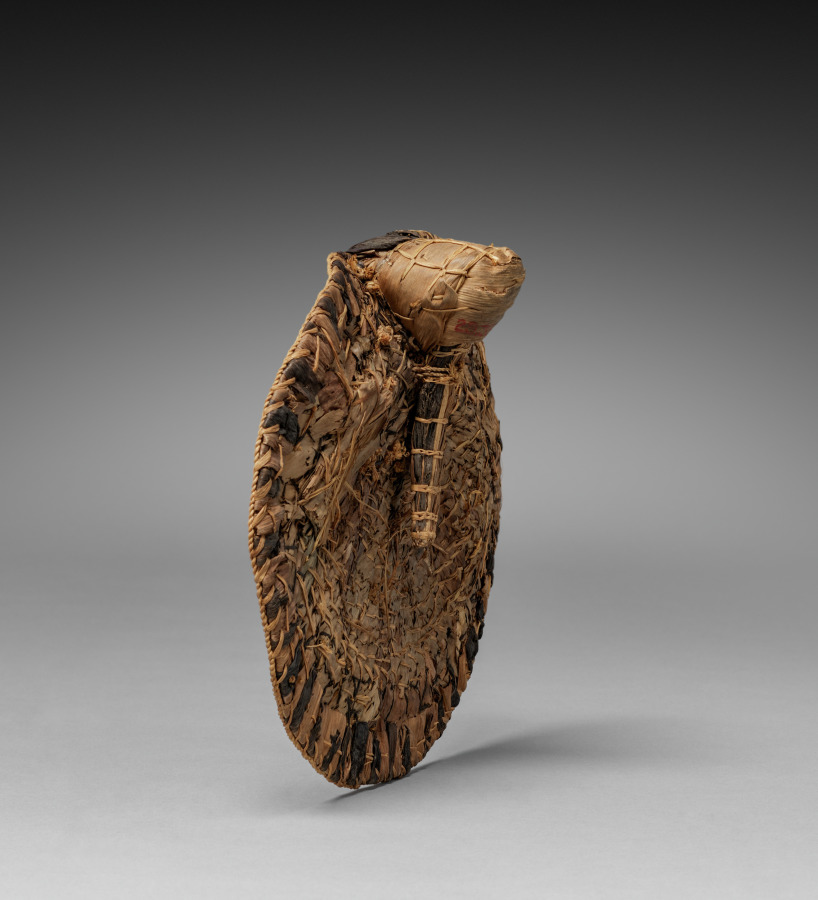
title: Back Skirt/Sitting Pad (negbe)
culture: Africa, Central Africa, Democratic Republic of Congo, Mangbetu-style makers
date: by 1928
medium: Plant fibers and dye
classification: Garment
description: Egbe (singular: negbe) were fashionable and practical garments aristocratic Mangbetu women made for special occasions. Worn over a skirt, it tied onto a girdle along with a frontal “apron.” The curved interior piece rested on the lower back. Thickly woven, flexible natural fibers bent with the body, cushioning the wearer’s behind when sitting. When the woman was standing, the decorated flat portion faced outward, showing off bold geometric motifs. Egbe were among items sold to foreigners at the Mangbetu king’s encouragement as the Mangbetu actively constructed their self image for outsiders during the 1920s and 1930s.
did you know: A curved "handle" on the negbe's interior allowed it to rest on the tailbone.